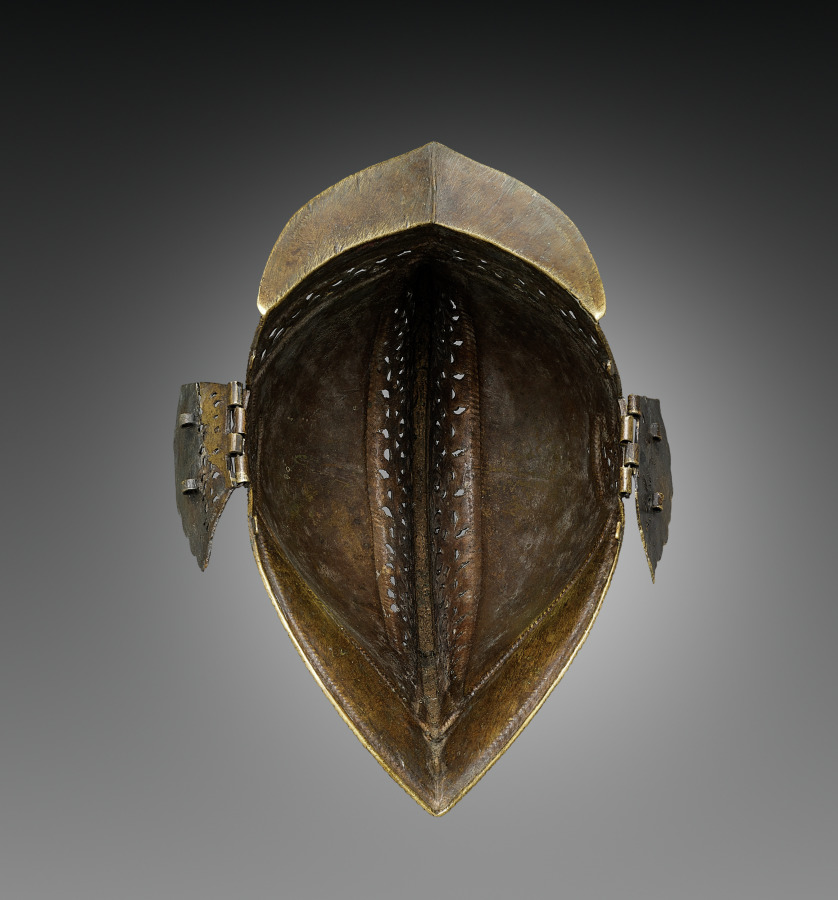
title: Helmet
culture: Philippines, Mindanao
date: 1800s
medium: Brass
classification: Arms and Armor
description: The predominantly Muslim Maranao people of the southern Philippines developed a rich material culture—including brass work, textiles, weaponry, and architecture—commonly featuring a curvilinear, geometric ornament known as okir. This helmet, while based on Spanish types, features filigree vents and openwork embellishment that are distinctively Mindanao. The top might once have been decorated with feathers or other ornaments.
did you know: Bacolod, the traditional homeland of the Maranao people, is a historic pangampong (fortified settlement) on Lake Lanao.